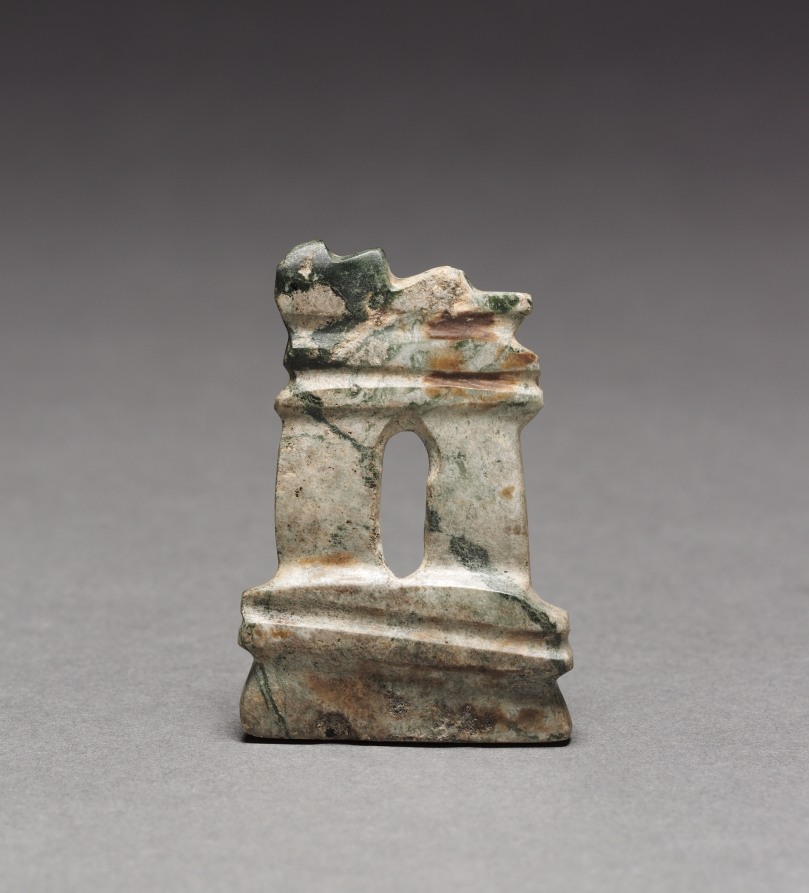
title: Architectural Model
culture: Mesoamerica, Mexico, Guerrero, Mezcala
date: 100 BCE–300 CE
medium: serpentine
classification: Sculpture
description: The Mezcala style takes its name from a river in its homeland, the Guerrero region of western Mexico. The style is known for small-scale stone sculptures including architectural “models” characterized by sleek abstraction. Because comparisons to actual architecture in the Mezcala region are scarce, it is not known whether the models refer to temples, houses, or underground funerary structures.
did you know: Estimated dates for Mezcala sculpture have ranged from 2000 BC to as late as 1454–1521.